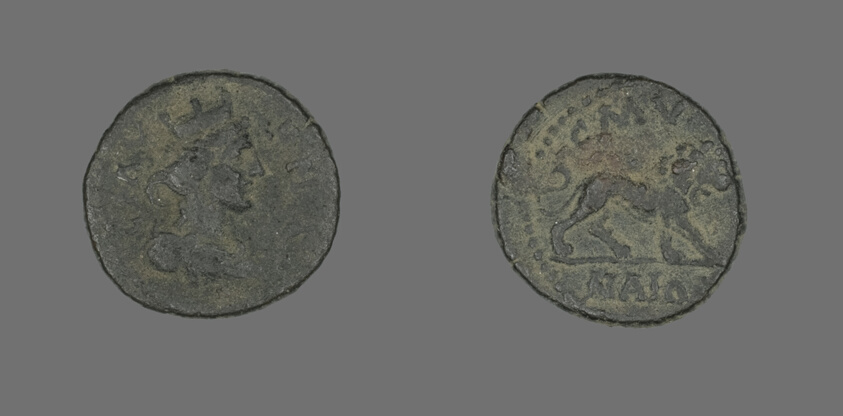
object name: Coin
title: Coin Depicting the Goddess Tyche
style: antonine, imperial (roman)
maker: Roman; Smyrna, Ionia (now Izmir, Turkey)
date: 98-192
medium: Bronze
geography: Smyrna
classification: coin; ancient art